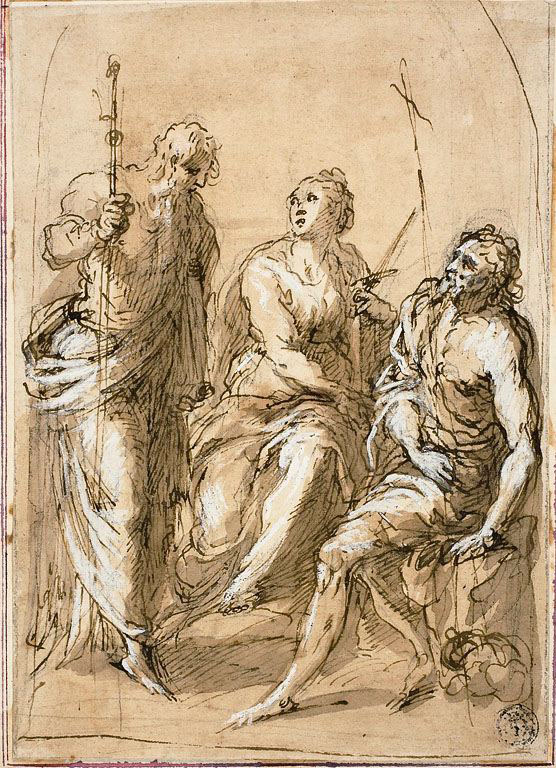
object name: Drawing and Watercolor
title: Saint Justina of Padua Enthroned, with Saints James the Less and John the Baptist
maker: Jacopo Negretti, called Palma il Giovane; Italian, c. 1548-1628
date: 1600/05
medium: Pen and brown ink with brush and brown wash, heightened with lead white, over black chalk, on ivory laid paper, laid down on cream laid card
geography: Italy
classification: ink with wash; drawings (visual works); prints and drawing